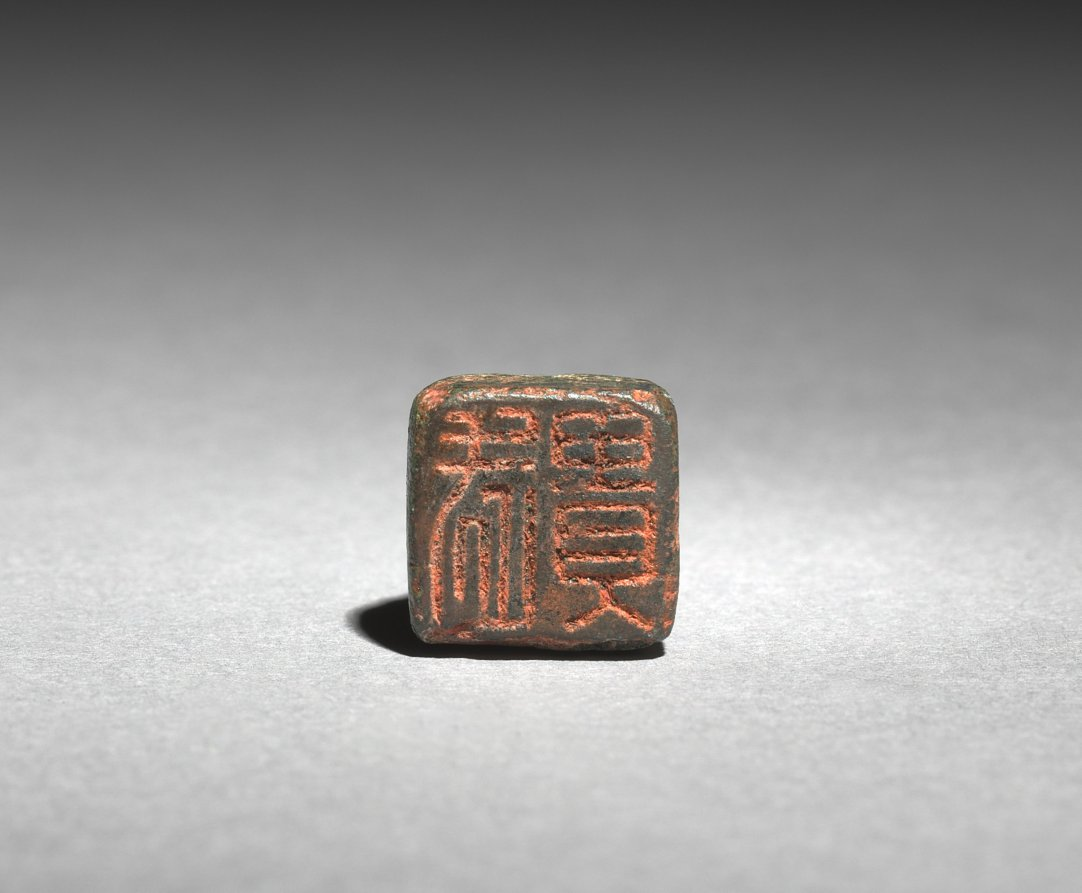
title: Seal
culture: Korea, Goryeo dynasty (918–1392)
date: 1100s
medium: bronze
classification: Metalwork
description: A large quantity of bronze seals were excavated from tombs of the Goryeo dynasty. This turtle-shaped seal bears two inscribed characters: 武貴, meaning "military highness." The red cinnabar paste is still visible, indicating it must have been used for signing various documents, while its owner was still alive.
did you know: A large quantity of bronze seals excavated from tombs of the Goryeo dynasty is closely related to the development of metallurgy in 13th-century Korea that allowed the transition from wood type to movable metal type printing.